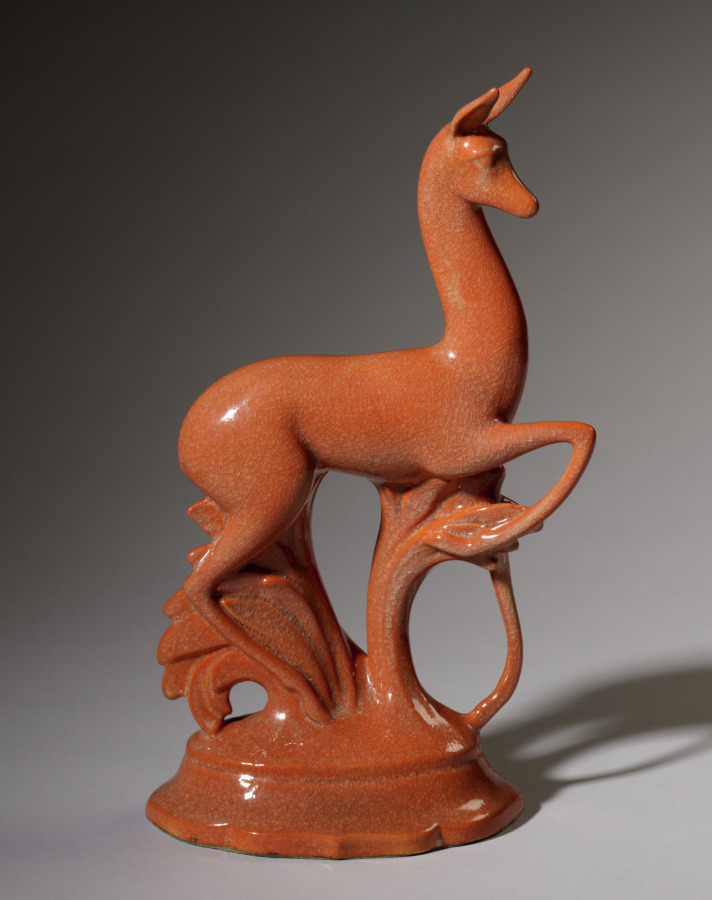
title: Fawn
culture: America, Ohio, Cleveland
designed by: Waylande Gregory (American, 1905–1971)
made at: Cowan Pottery Studio (America, Ohio, Rocky River, 1920–1931)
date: 1929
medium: earthenware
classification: Ceramic